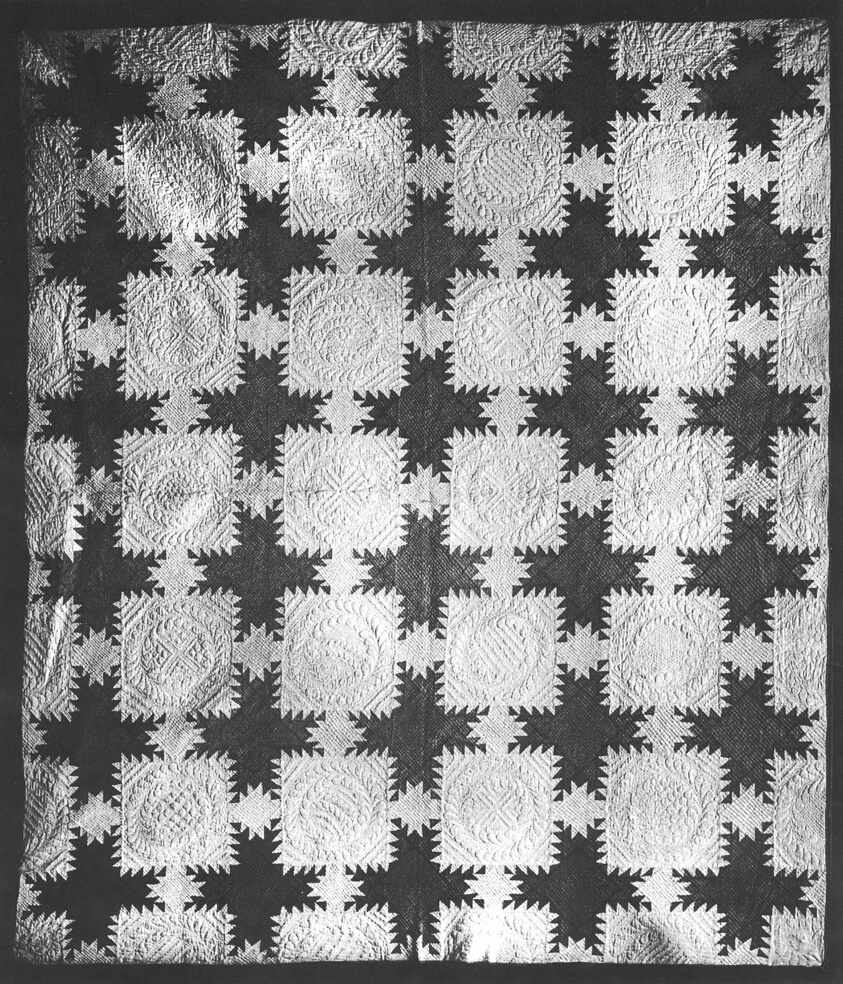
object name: Textile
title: Bedcover (Feather-Edged Star Quilt)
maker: Nancy Margaret (née Crow) Mooney (American, 1850-1925); United States, Pennsylvania or West Virginia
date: 1880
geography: Pennsylvania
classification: textile; needlework - quilt